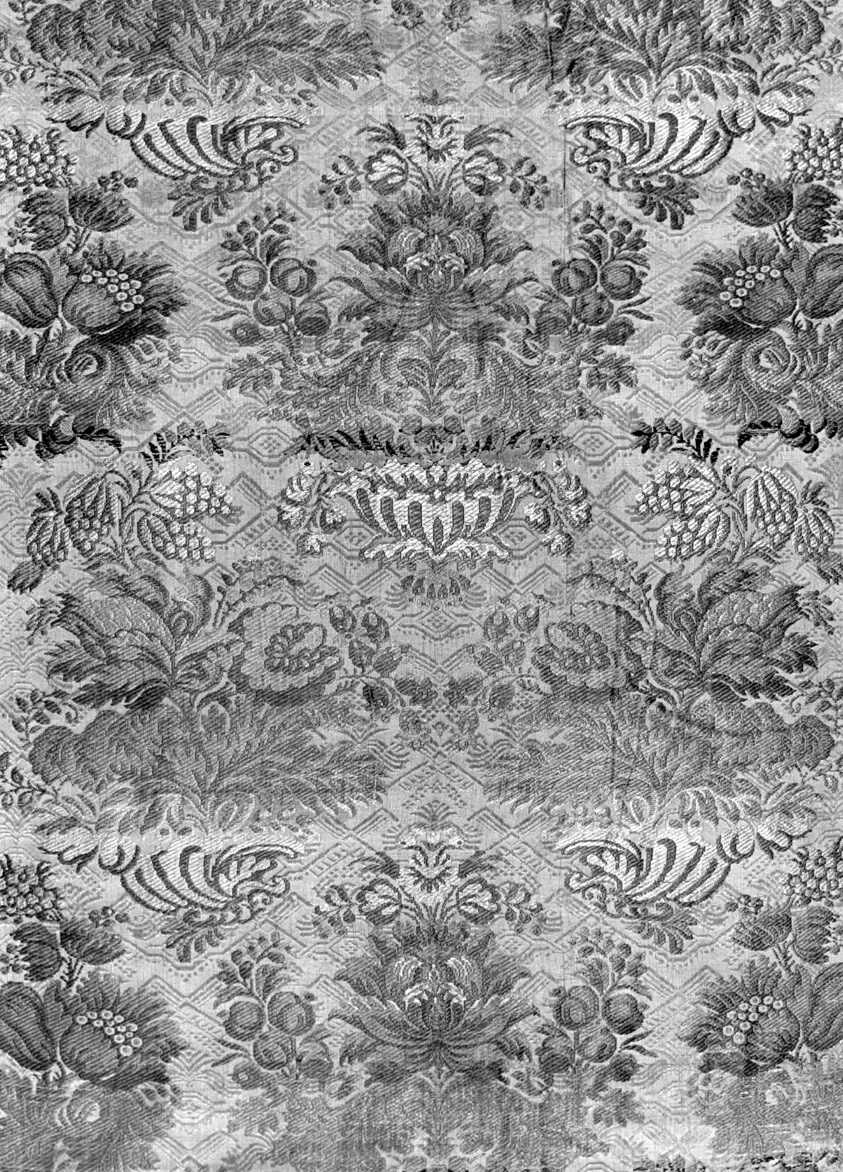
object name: Textile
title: Panel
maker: France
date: 1725/1775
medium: Silk, plain weave with supplementary patterning warps and supplementary patterning and brocading wefts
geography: France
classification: textile; weaving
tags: floral arrangements, urns